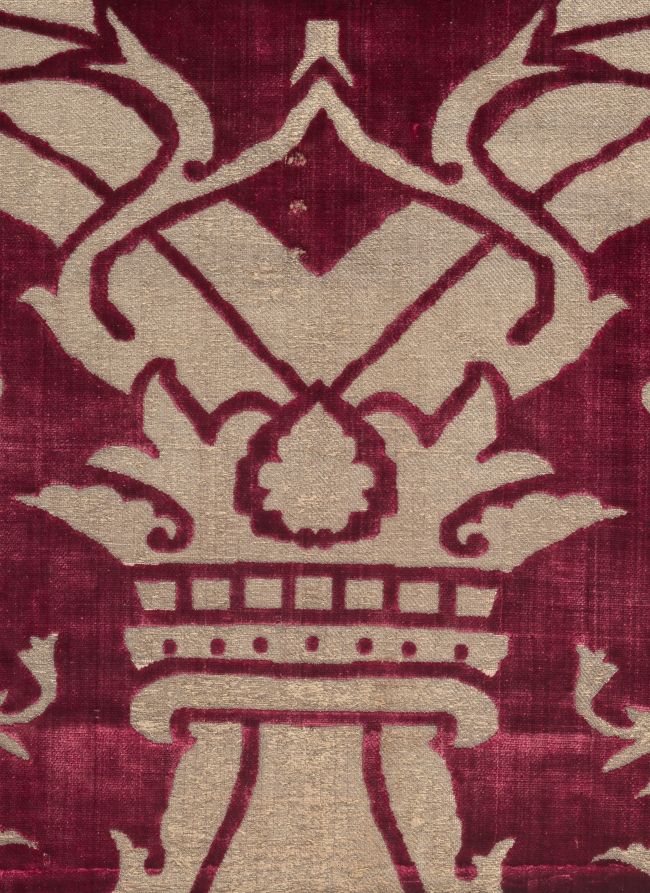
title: Brocaded Velvet Panel with Italianate Pattern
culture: Turkey, Istanbul or Bursa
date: 1575–1625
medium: Silk: velvet, brocaded; gilt-metal thread and cotton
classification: Velvet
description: Rarely are four fabric widths preserved together from any culture. This gilt-metal thread pattern combines Turkish and Italian features: the large ogival (curved) lattice clasped by crowns and the velvet structure are Turkish, and the two so-called artichoke designs are enlarged adaptations of Italian motifs. A symbol of wealth and power, this velvet panel was woven during the artistic height of the Ottoman Empire in the late 1500s. It may have covered a divan (sofa) or possibly enhanced a wall during cold winters in the imperial Topkapi Palace in Istanbul.